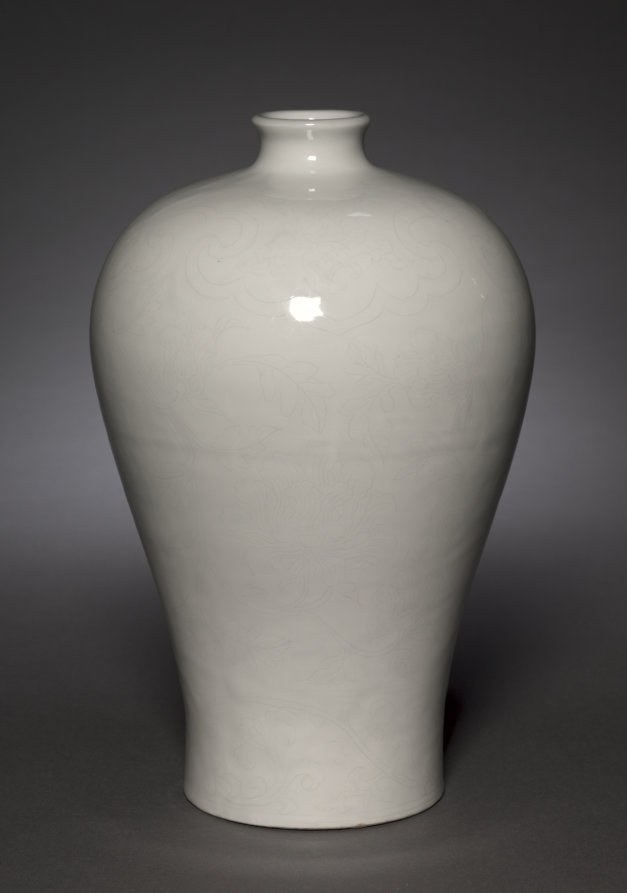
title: Meiping Vase with Cloud Collars and Peony Sprays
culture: China, Jiangxi province, Jingdezhen kilns, Ming dynasty (1368-1644), Yongle period (1403-1424)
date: 1403–24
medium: porcelain with incised decoration and white glaze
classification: Ceramic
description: This beautiful vase, called a meiping, is a testimony to the extremely high standards demanded for imperial white porcelain of the Yongle period. It is exquisitely potted and subtly decorated with "hidden decoration" (anhua) incised into the body. The clear glaze over the white body has a luster and purity; the white color radiates with a soft glow like melting snow, described by the Chinese connoisseurs as tianbai, or "sweetwhite." Tianbai wares were produced for use in imperial offerings and have always been considered a great achievement of the Yongle period.